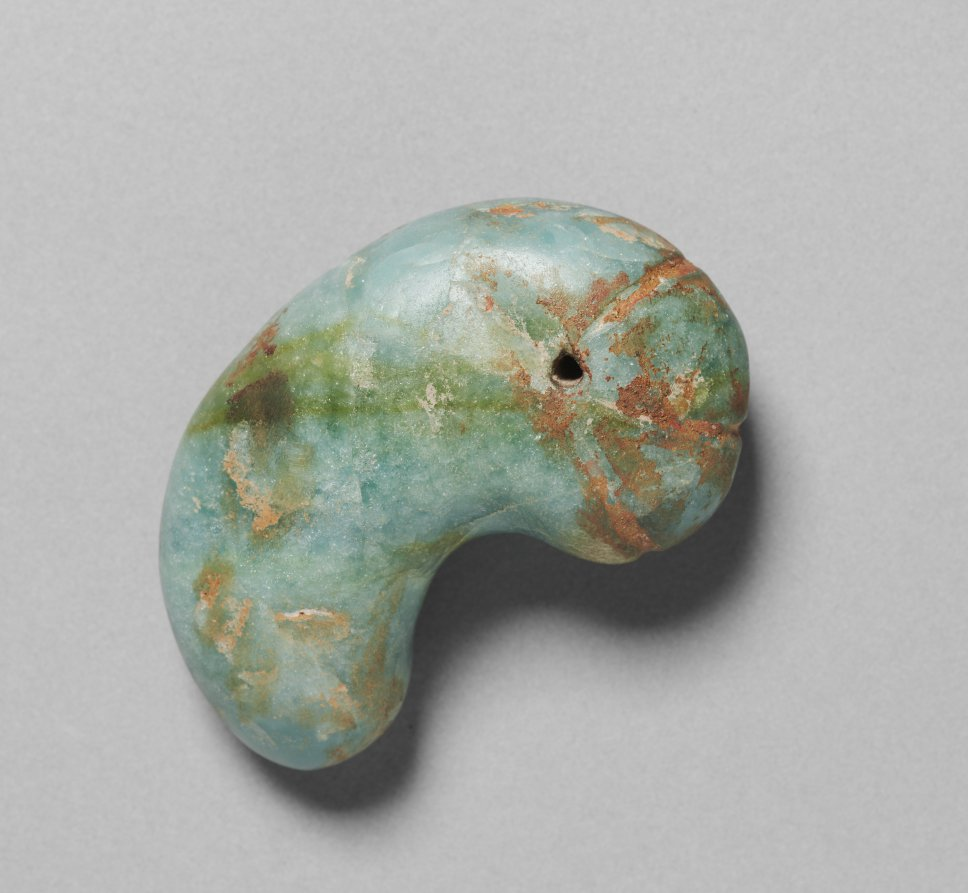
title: Comma-shaped Jade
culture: Korea, Three Kingdoms period (57 BCE–668 CE)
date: 400s CE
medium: jade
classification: Jewelry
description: Jade is one of the hardest stones and requires an intensive, arduous process of abrasion—cutting, chiseling, grinding, and polishing—to achieve the desired shape. A grindstone and a slurry of grit and water shape the jade into the desired form, and then a cloth dampened and rubbed with finer grit may have been used to give the jade the smooth surface. For the Silla kingdom (57 BC–985), in particular, comma-shaped jades served as an essential item for the burials of the ruling class and were luxurious accessories to decorate golden crowns. Their comma shape is thought to represent embryonic forms, symbolizing life, particularly rebirth in the afterlife.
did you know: This unique shaped jade was used as a pendant to decorate necklaces, eyerings, and crowns during the Three Kingdoms period.